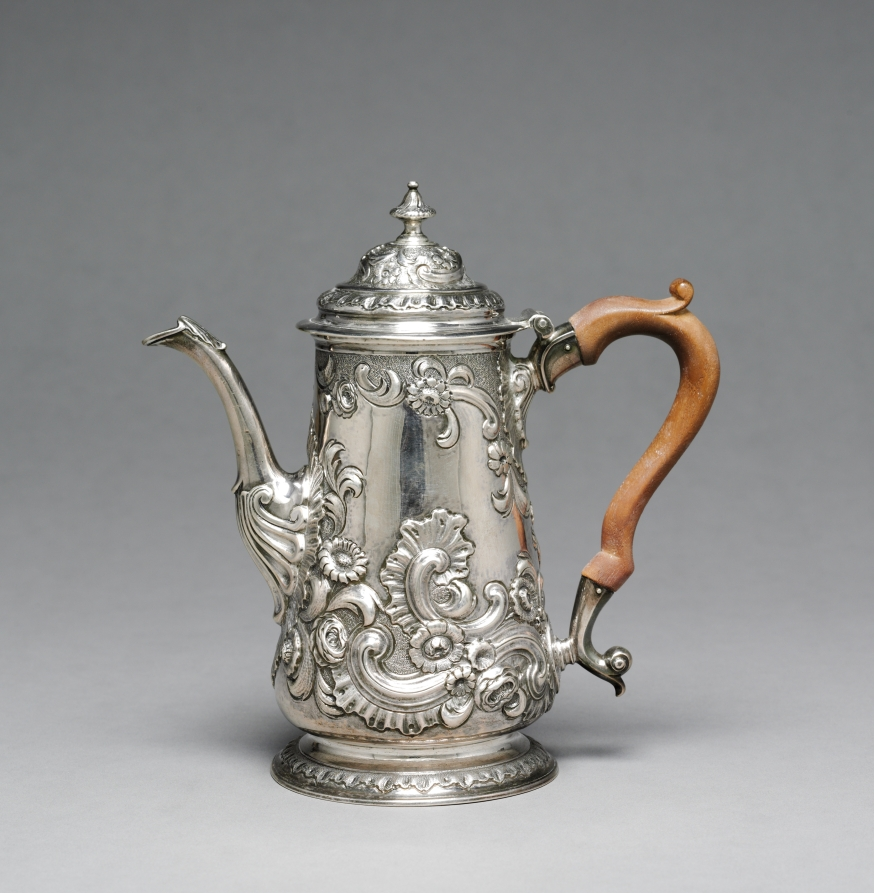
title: Coffee Pot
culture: England, Newcastle, 18th century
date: 1742–1743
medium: silver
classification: Silver